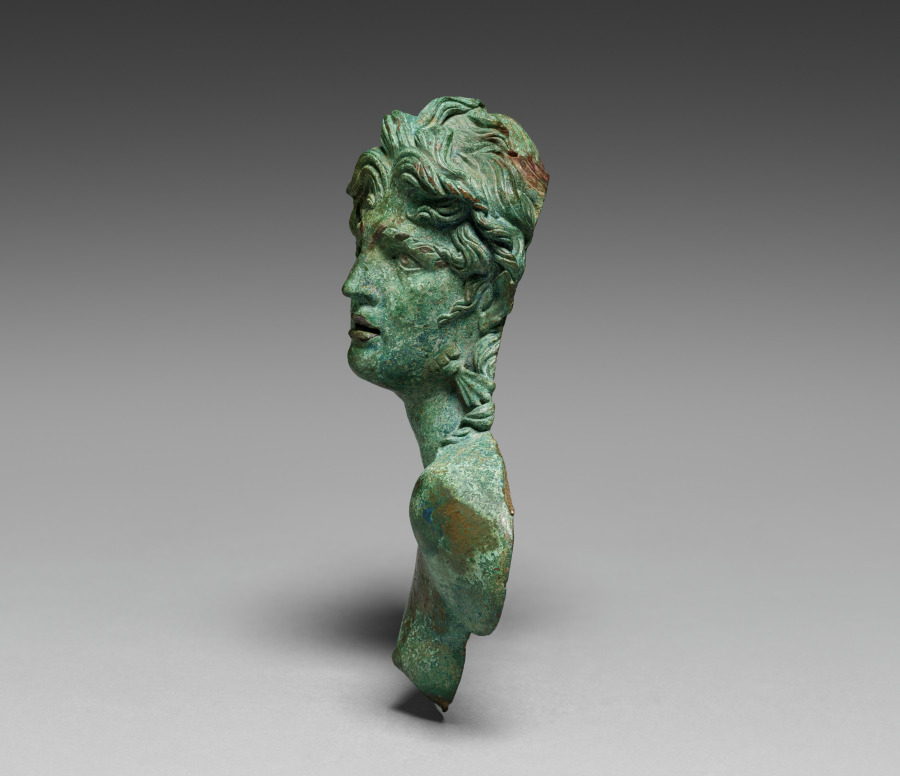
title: Tritoness or Scylla Relief Applique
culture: Greece, Hellenistic period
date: late 200s BCE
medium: bronze with copper inlays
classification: Metalwork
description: The seaweed garment, finned gills, and webbed ears give this female bust appliqué all the hallmarks of an ocean dweller. She may be a Tritoness, a minor goddess of the sea and the female counterpart to the more common Triton. However, her intense gaze and raised arm clutching perhaps the hilt of a sword suggest she may be Scylla, a sea monster that first appears in Homer’s Odyssey. Without the Tritoness’s fishtail or Scylla’s lower body made of dogs’ heads, it is difficult to differentiate. Certain features are highlighted with a copper inlay such as the lips, eyes, and gills.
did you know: Mythological sea creatures became popular metal vessel decorations around the 2nd-century BCE.